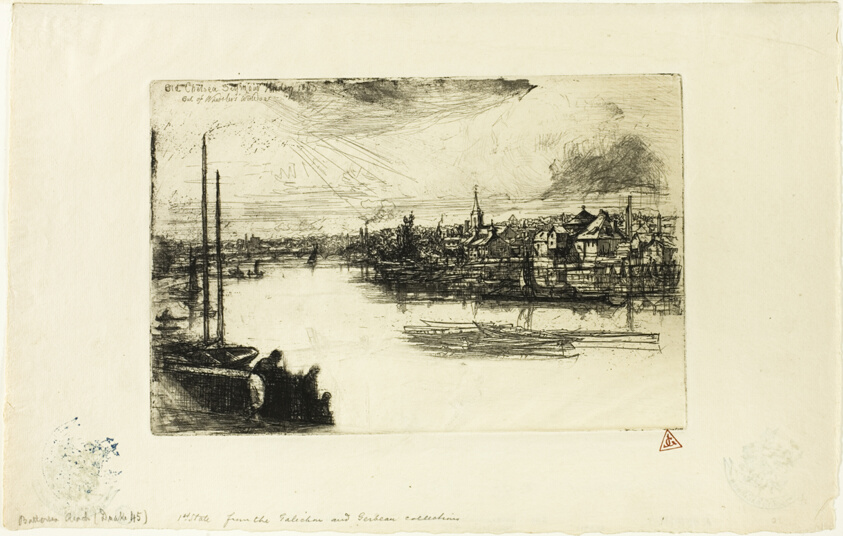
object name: Print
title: Battersea Reach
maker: Francis Seymour Haden (English, 1818-1910)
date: 1863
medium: Etching with drypoint on ivory laid paper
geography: England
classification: etching; print; prints and drawing